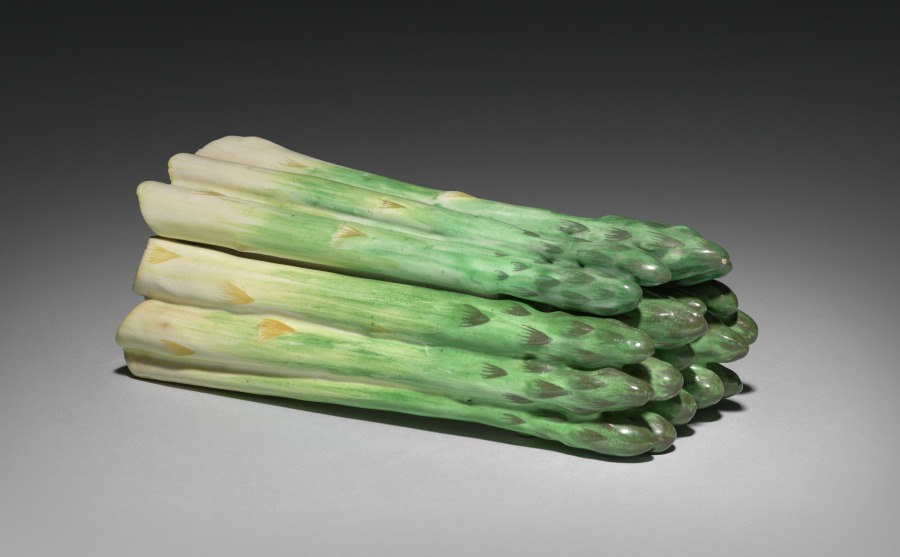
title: Box in the Form of Asparagus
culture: France, Sceaux(?), 18th century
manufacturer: probably by Sceaux Factory (French, active 1748–66)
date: c. 1765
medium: tin-glazed earthenware (faience) with enamel decoration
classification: Ceramic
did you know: Placed upon the dinner table, this container's lid might be lifted to reveal steaming asparagus. Imagine a wealthy 18th-century dining room with flickering candles, whimsical sculptures, and dishes like this decorating the table.